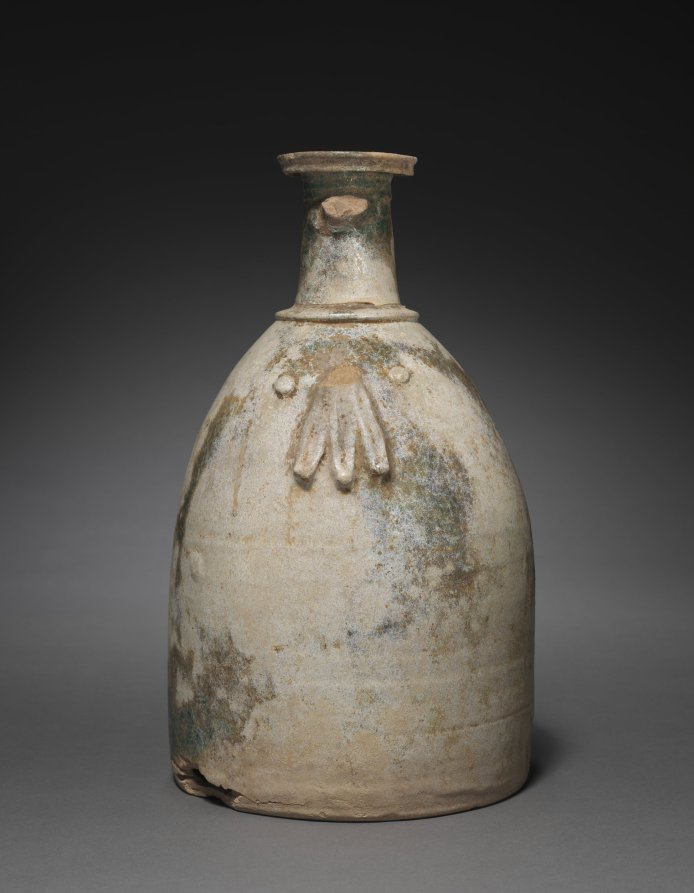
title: Jar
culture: Parthian Empire (247 BCE–224 CE)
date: 1–200 CE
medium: terracotta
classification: Ceramic